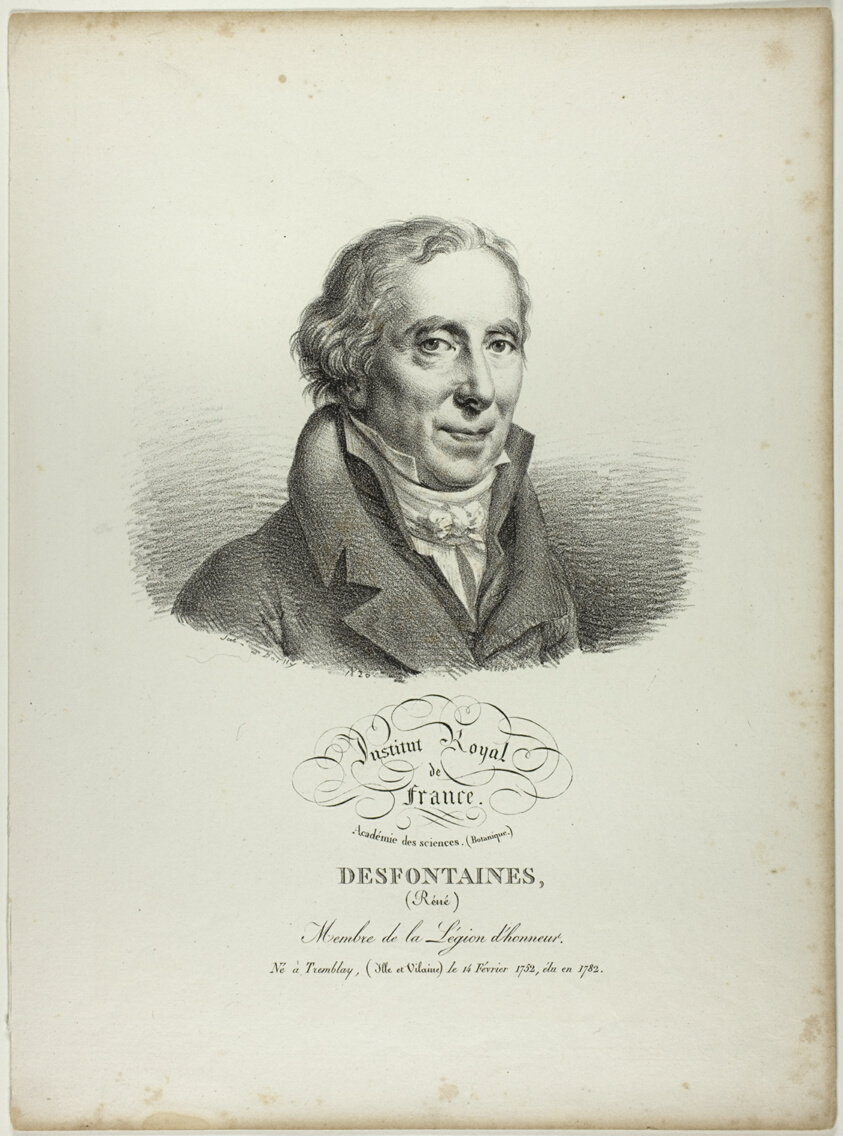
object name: Print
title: Portrait of Réné Desfonataines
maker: Jules Boilly (French, 1786-1874)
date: 1820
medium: Lithograph in black on ivory wove paper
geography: France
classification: lithograph; print; prints and drawing